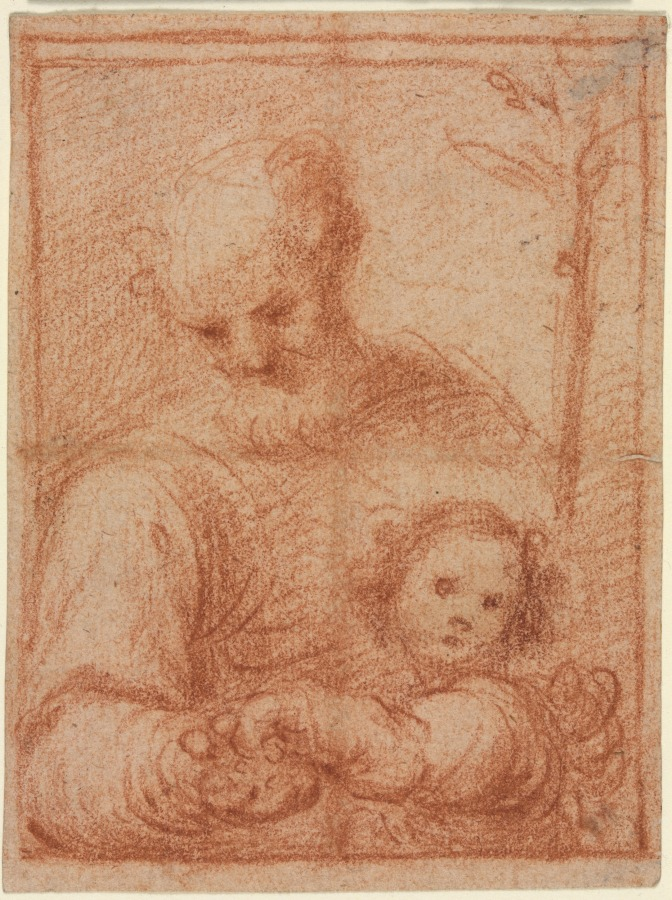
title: Joseph and Child (recto); Fragment of Two Figures (verso)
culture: Italy, 16th century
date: 16th century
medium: red chalk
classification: Drawing